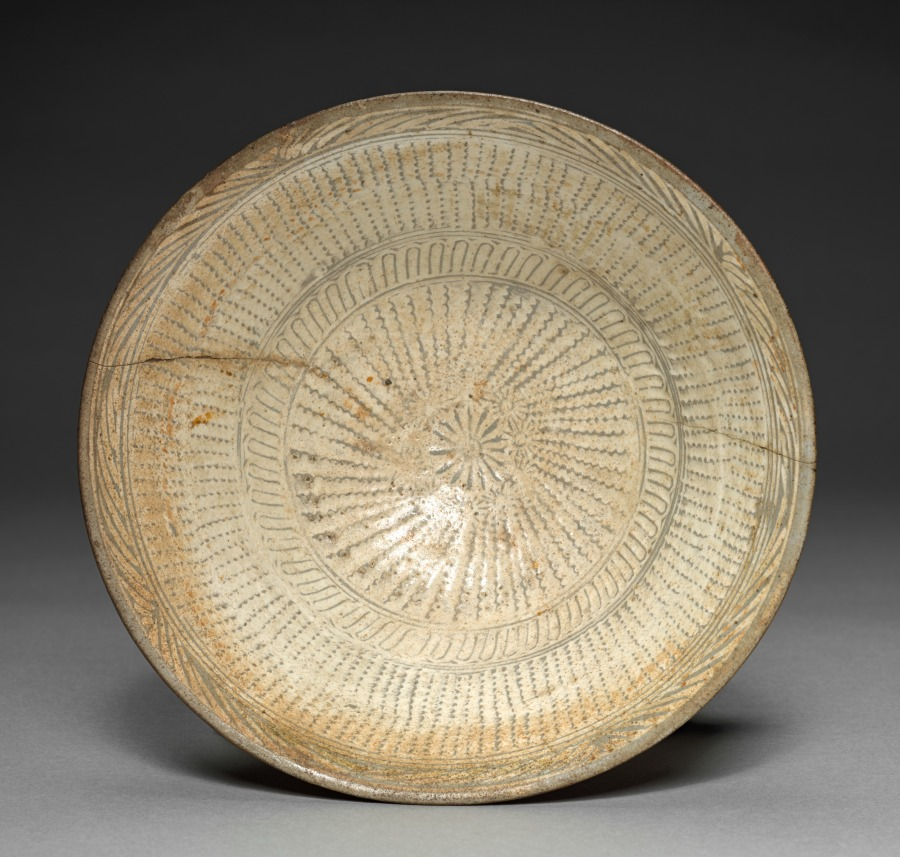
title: Bowl with Stamped Floral Decoration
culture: Korea, Joseon dynasty (1392–1910)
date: 1600s–1700s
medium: glazed ceramic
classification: Ceramic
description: This type of wide-mouthed bowl was used everyday in Korea, not exclusively for tea drinking. But when it was introduced to Japan around the early 16th century, its imperfect appearance evoking the aesthetics of wabi-sabi caused it to be repurposed as tea bowls in Japan. Possibly produced in one of the kilns established by the trading office (Waegwan) in Busan, southern Gyeongsang province, this type of bowl was sold to Japanese elite collectors.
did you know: This type of humble tea bowl was highly praised among Japanese collectors for its imperfect beauty.